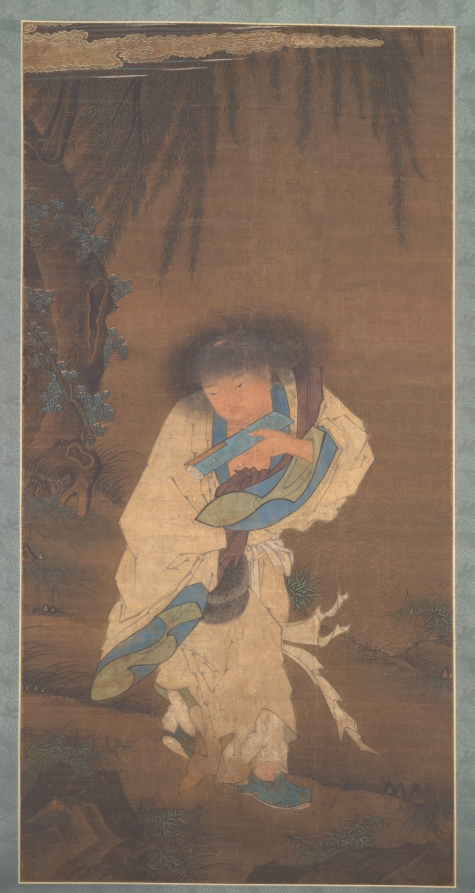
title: Poet and Recluse Hanshan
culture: China, Ming dynasty (1368–1644)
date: 1400s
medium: hanging scroll; ink and color on silk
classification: Painting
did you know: Hanshan, a Tang poet of vernacular verses, is often associated with Chan Buddhism and is considered a deity in disguise.